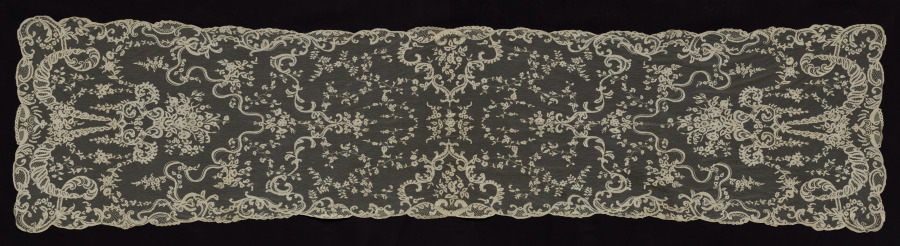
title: Lace Veil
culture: Ireland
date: 1800s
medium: Machine-made lace net (Carrickmacross) with appliqué and tambour work (chain stitch)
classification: Lace